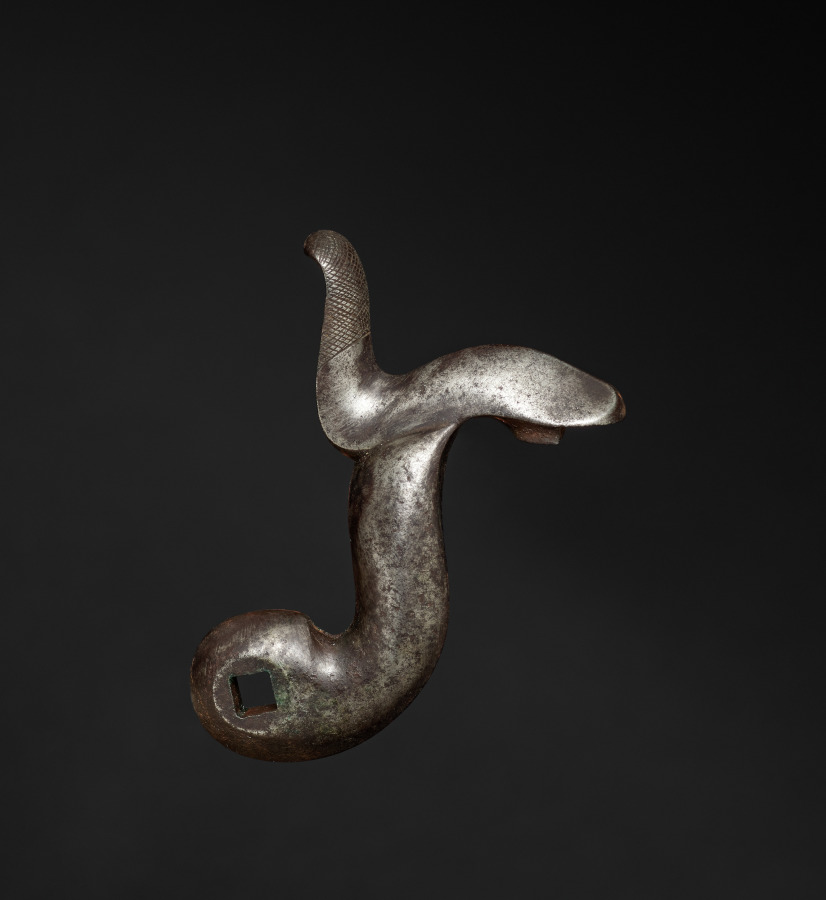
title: Gun-Lock Hammer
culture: England, early 19th century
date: c. 1800–1825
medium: steel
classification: Arms and Armor